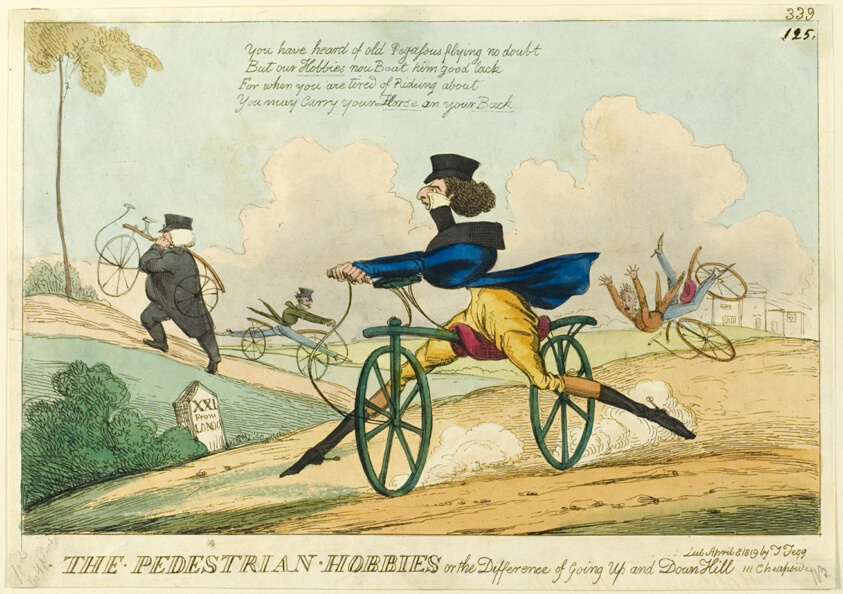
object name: Print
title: The Pedestrian Hobbies, or the Difference of Going Up and Down Hill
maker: Attributed to William Heath (English, 1794-1840); published by Thomas Tegg (English, 1776-1845)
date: published April 8, 1819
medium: Hand-colored etching on ivory wove paper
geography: England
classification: etching; print; prints and drawing